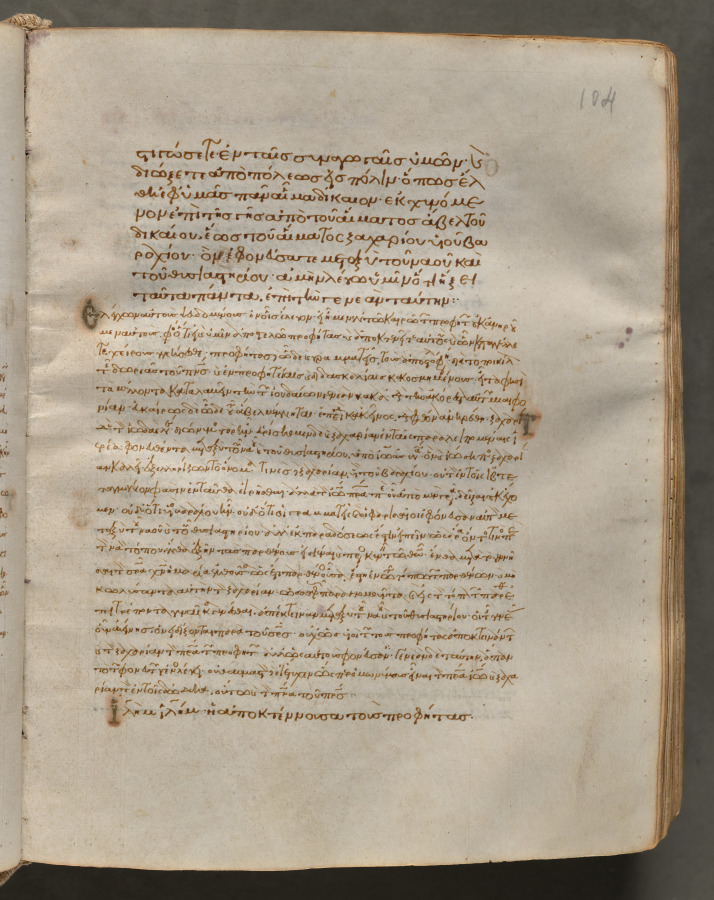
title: Text, folio 104 (recto), from a Gospel Book with Commentaries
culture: Byzantium, Constantinople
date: c. 1000–1100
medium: ink, tempera, and gold on vellum; leather binding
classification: Bound Volume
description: Each of the four gospels in this book opens on a page with brilliantly illuminated borders depicting the author of the text as well as birds-principally peacocks, symbols of the immortality of the soul-and fountains, representing the fountain of life and the salvation of the soul. This volume consists of 428 leaves with texts in Greek. Its level of sophistication suggests that it was probably written and decorated in a monastery in Constantinople.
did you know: Gospel Books were carried in procession through Byzantine churches.